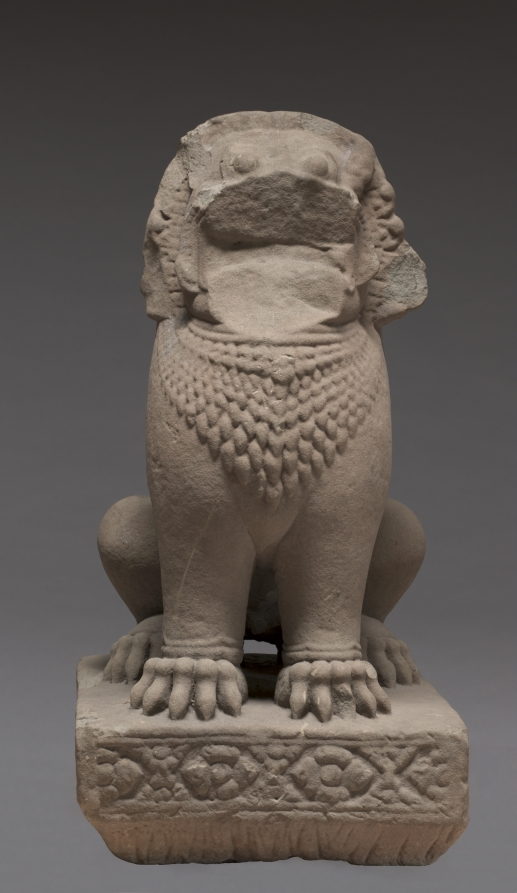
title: Lion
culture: Cambodia, Khmer, Angkorean period (877-1431)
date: 1100s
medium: stone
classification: Sculpture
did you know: Lions were not native to Cambodia.